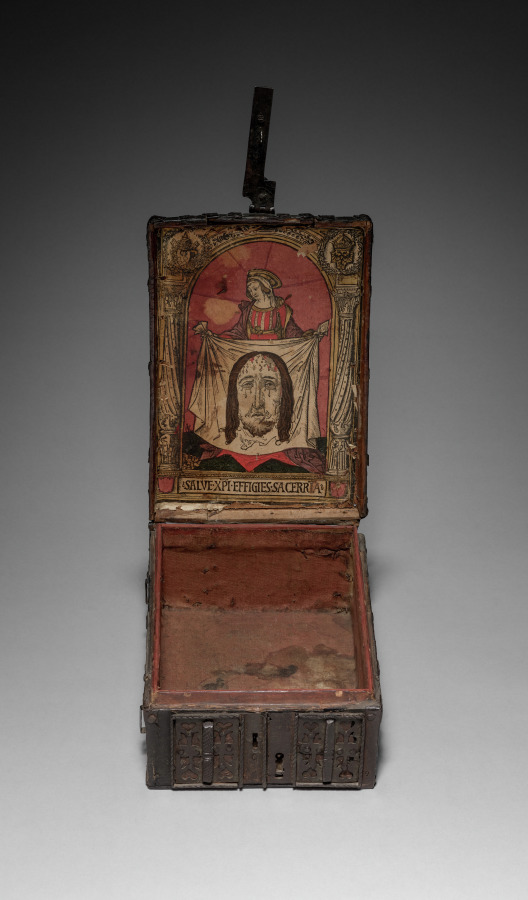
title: Coffret with Woodcut of Saint Veronica's Vernicle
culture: Coffret: France, probably Paris; Woodcut: Germany, Augsburg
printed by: Hans Burgkmair the Elder (German, 1473–1531)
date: Coffret: c. 1515; Woodcut: c. 1509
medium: Wood, leather, iron, textile, woodcut with stenciled coloring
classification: Print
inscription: SALVE. XPI. EFFIGIES. SACERRI[M]A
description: This remarkable object is thought to have functioned as a traveling case to keep small valuables and books, as well as a provisional altar. Made in France around 1515, the interior lid is affixed with a devotional woodcut made in Germany, imported, and colored for the purpose. Featuring an image of the veil of Saint Veronica, the text at the bottom of the woodcut guides the user in prayer to the holy image of Christ’s face which has been miraculously imprinted on the veil, an action that held promise of indulgences (a reduction in one’s punishment for sins). Presumably, the owner carried the box on a journey, retrieved a prayer book from inside, and propped it open in order to practice daily prayers.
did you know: A secret compartment on the top lid of this coffer may have held a relic, consecrated host, or valuable document.